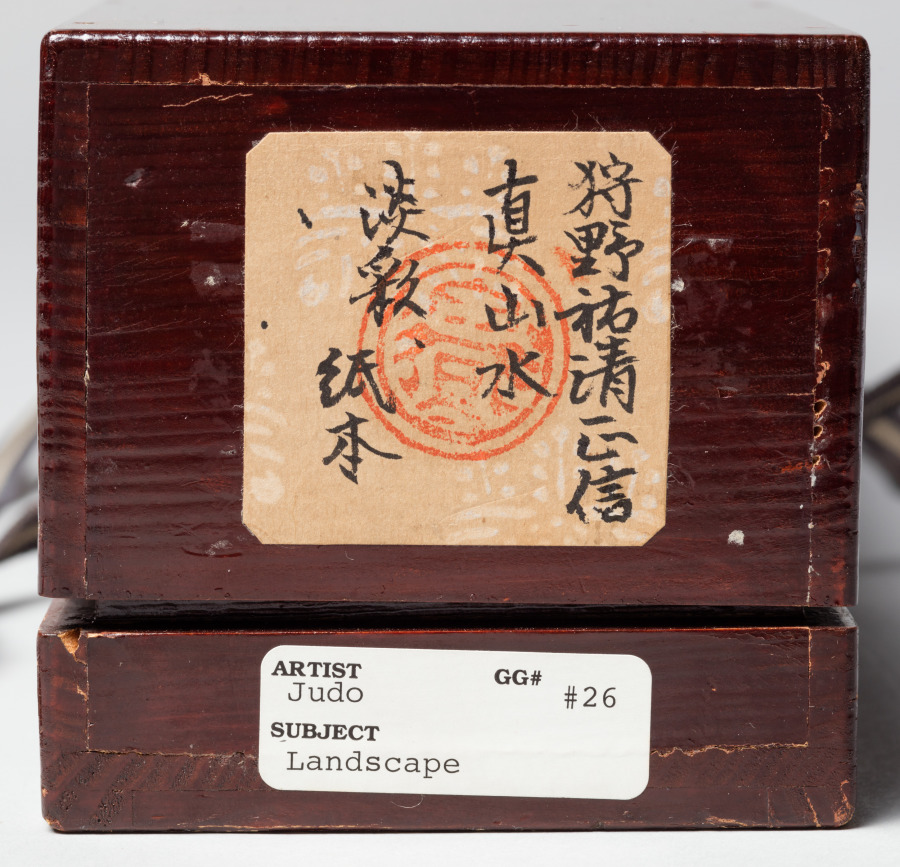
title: Landscape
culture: Japan, Muromachi period (1392–1573)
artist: Judō (Japanese, active 16th century)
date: 1500s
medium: hanging scroll, ink and light color on paper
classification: Painting